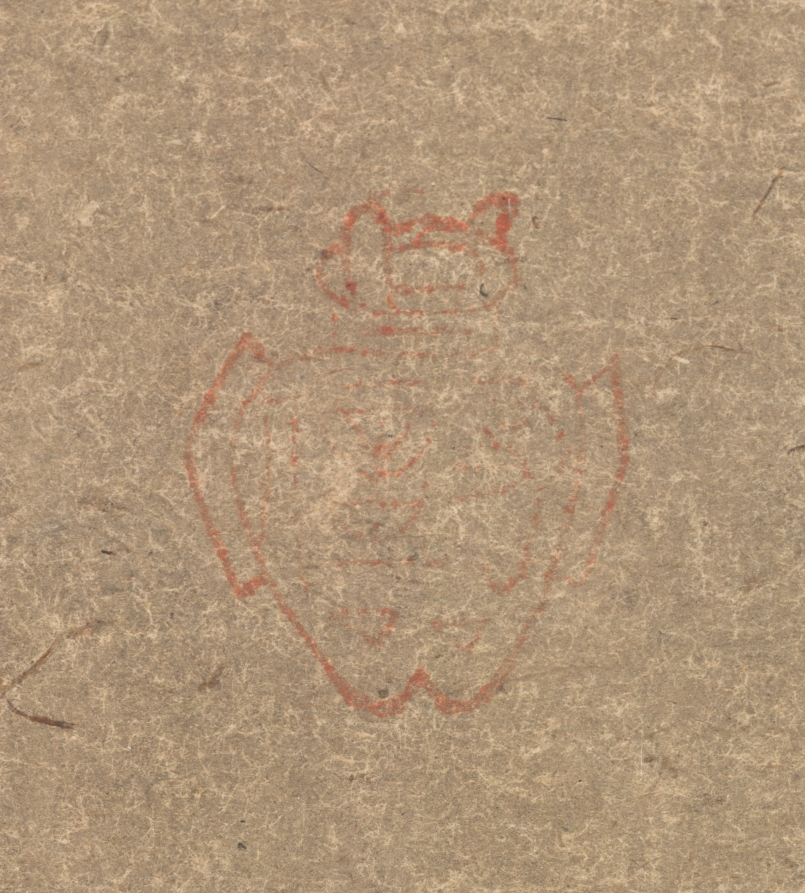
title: Hotei with Daoist Immortals: Immortal with Gourd and Dragon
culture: Japan, Edo period (1615–1868)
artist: Kyūseki Tomonobu (Japanese, 1653–1721)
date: late 1600s-early 1700s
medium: triptych of hanging scrolls: ink on paper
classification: Painting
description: Hotei was a Chan (Japanese: Zen) monk living in China during the 900s who, in the 1300s, became a legendary figure in Japan. At that time a popular cult praising him sprang up, extending beyond Zen to other religious communities. This rare triptych embraces a central Zen icon with flanking Daoist images, thereby suggesting the compatibility-rather than the exclusivity-of these two creeds. Hotei also enjoys popularity in Japan as a kind of genre, or folk figure, which explains his mirthful expression in Japanese paintings. The Daoist figures in contrast appear eccentric and foreign-looking, in keeping with Daoist lore. When these paintings came to the museum their appearance was compromised by poor quality textile mountings, and cracked paper surfaces deserving of restoration. The fact that these scrolls constituted an integral set that properly had to be shown as a unit heightened the need to stabilize their condition and improve their presentation for museum visitors. A complete remounting of each scroll occurred following the cleaning of the paper surfaces and the repair of the lifting surface areas. No inpainting was done, thereby preserving the original ink values and brushstrokes.